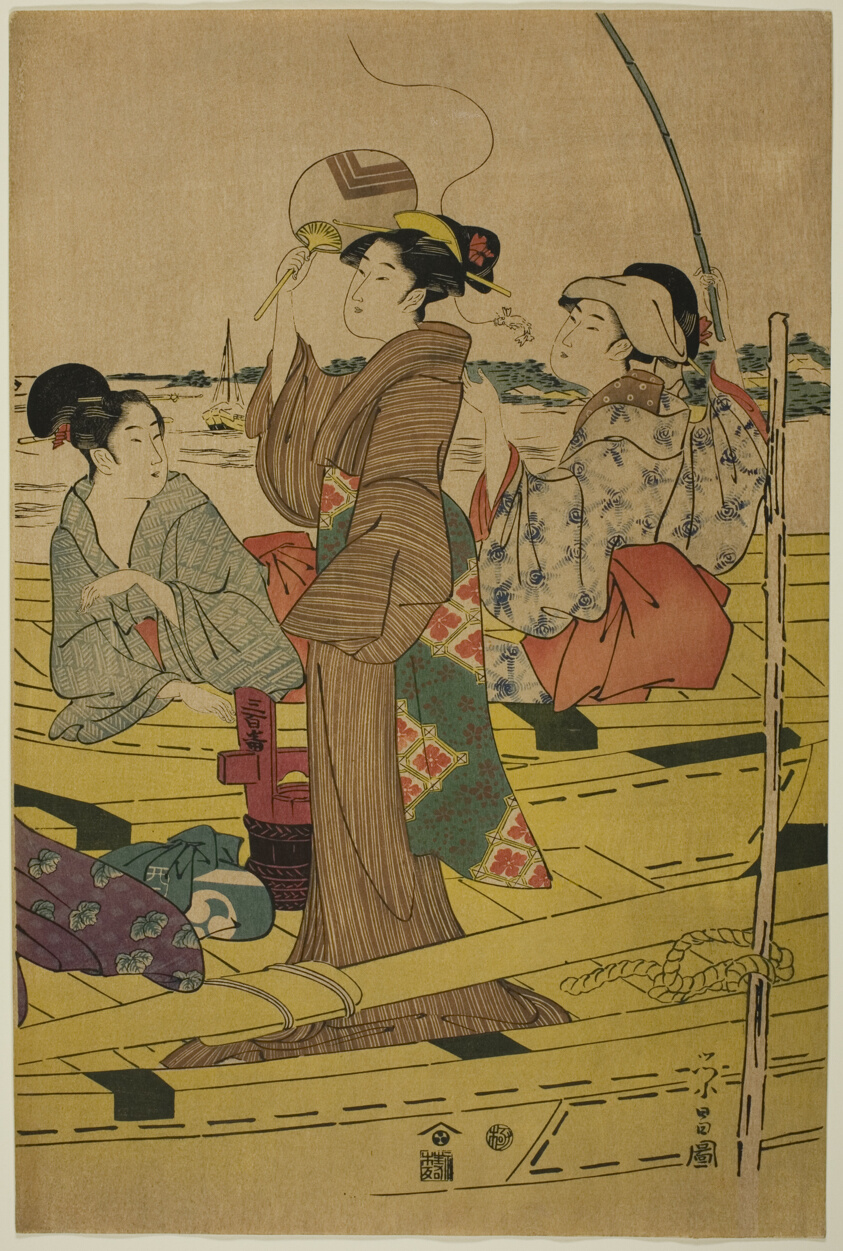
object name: Print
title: Women on a Fishing Boat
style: Japanese (culture or style)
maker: Chokosai Eisho (Japanese, active 1780-1800)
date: c. 1780/1800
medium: Color woodblock print; right sheet of oban triptych (center sheet: 1997.729b, left sheet: 1997.729c)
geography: Japan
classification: woodblock print; print